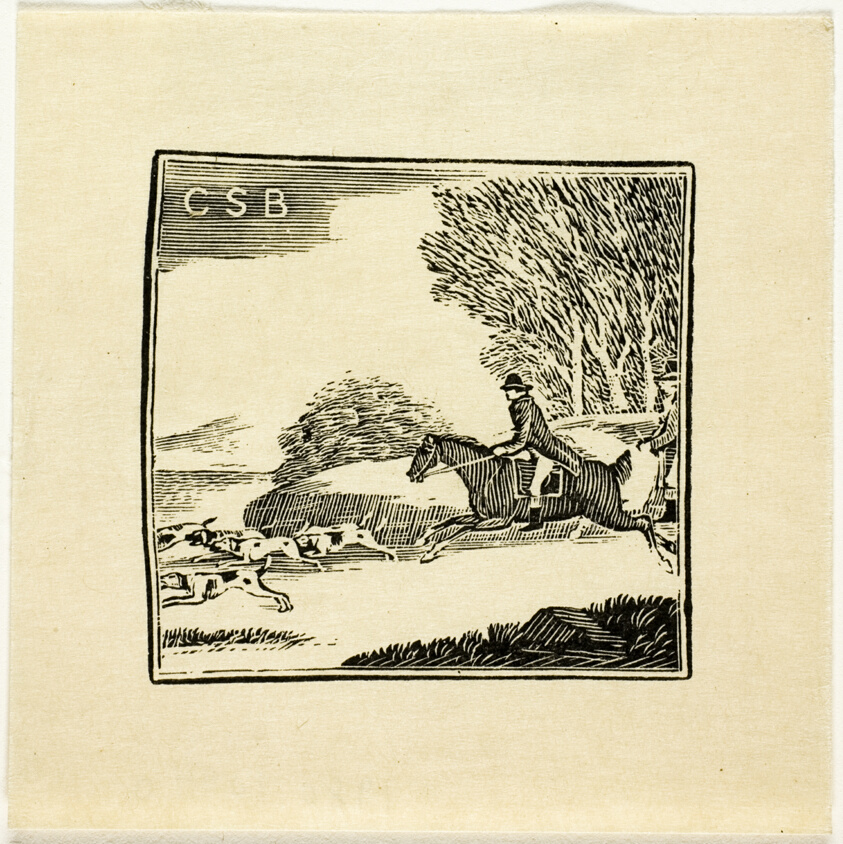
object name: Print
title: Book Illustration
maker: Thomas Bewick (English, 1753-1828)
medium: Wood engraving on paper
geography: England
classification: wood engraving; print; prints and drawing